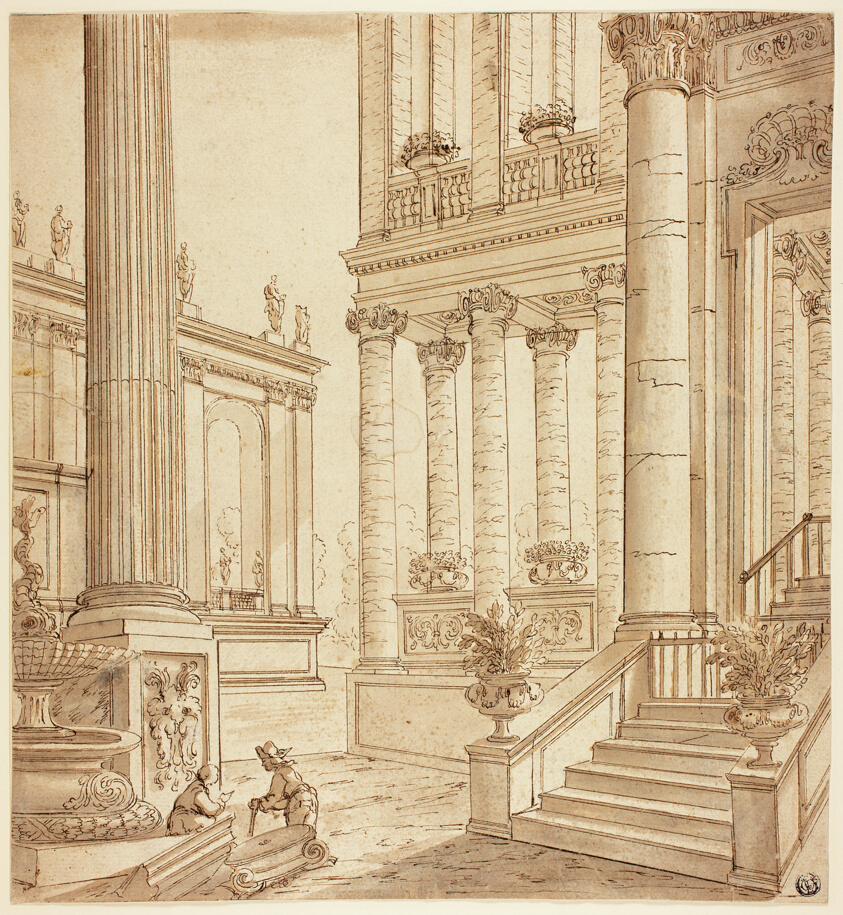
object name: Drawing and Watercolor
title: Colonnade Portico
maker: Unknown Artist; Italian, 1700-1800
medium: Pen and brown ink, with brush and brown wash, over traces of black chalk, on tan laid paper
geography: Italy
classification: drawings (visual works); prints and drawing